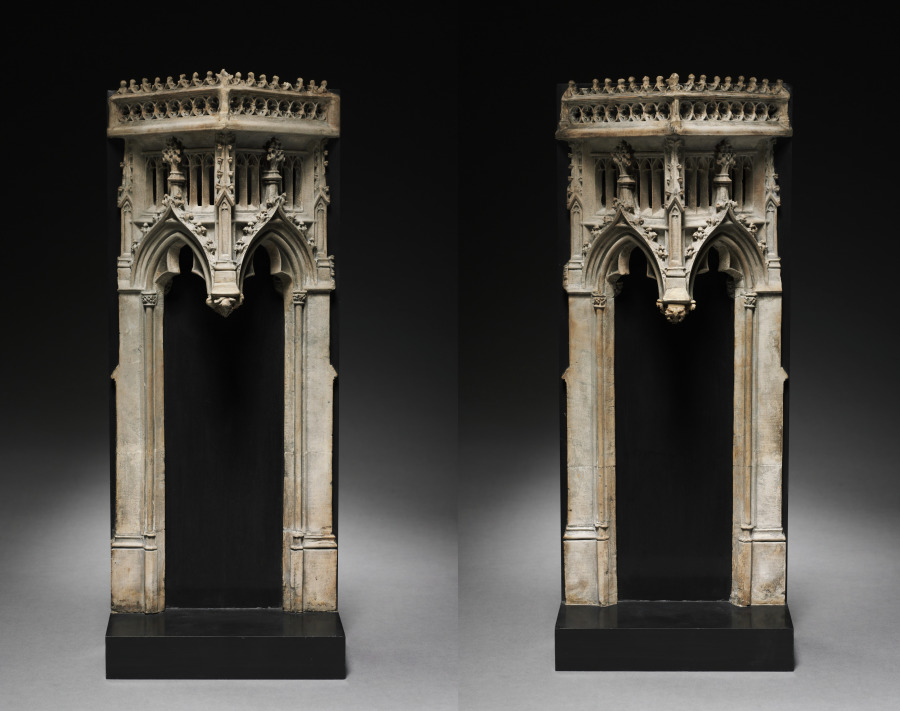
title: Architectural Canopy (pair)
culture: France, Burgundy, 15th century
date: c. 1450–1475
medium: limestone from Tonnerre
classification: Sculpture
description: Part of a pair of canopies, both must have originally belonged to an architectural ensemble like a tomb or a choir screen set within a church. Strikingly carved as architecture in miniature, they contain all of the elements of Flamboyant Gothic architecture of the late 15th century, so named after its flame-like stone tracery with wavy ornaments. This style of architecture is characterized by its intricacy of detailing and virtuosity of workmanship. Small sculptures may have originally occupied the space beneath the canopies.